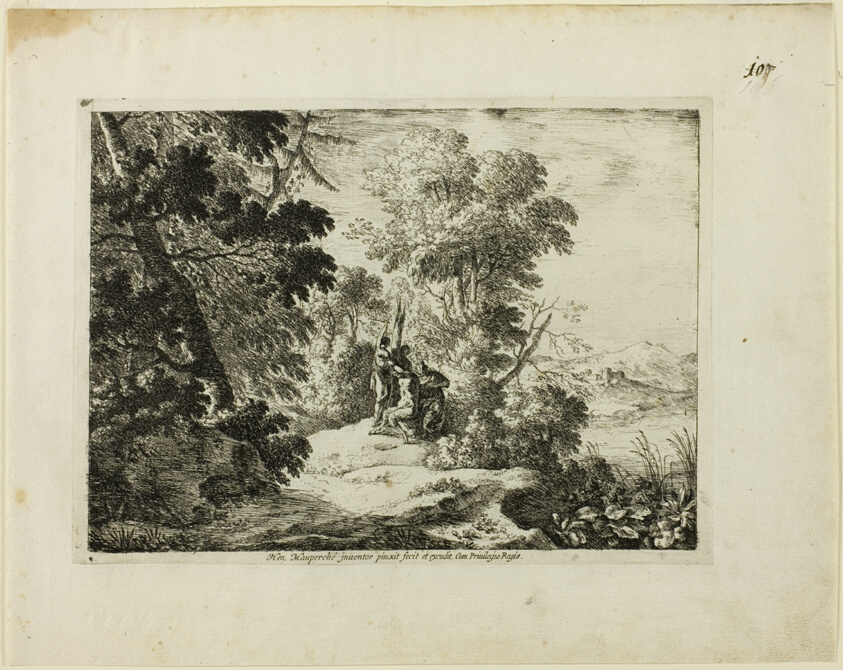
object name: Print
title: Flaying of Marsyas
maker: Henri Mauperché (French, 1602-1686)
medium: Etching on paper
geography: France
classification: etching; print; prints and drawing